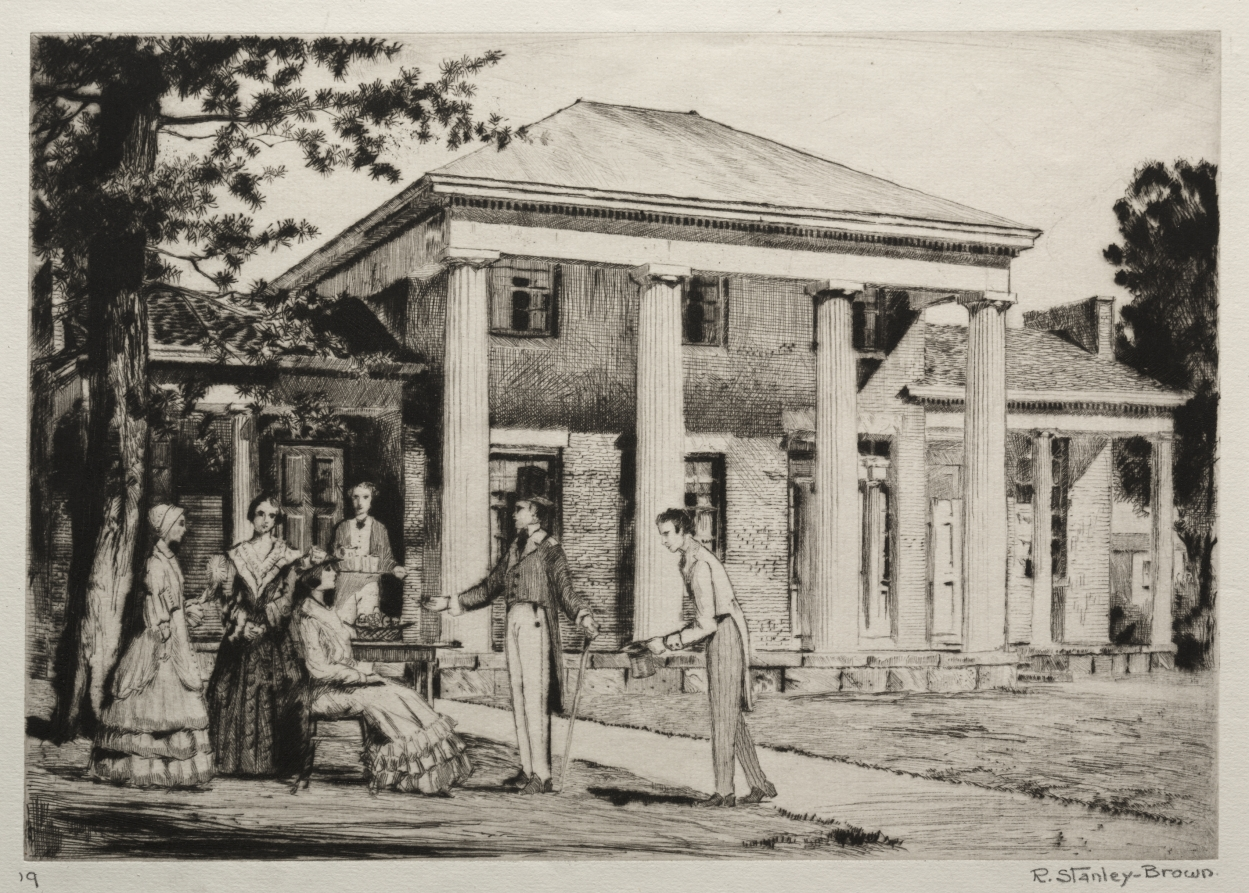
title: The Fifties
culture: America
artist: Rudolph Stanley-Brown (American, 1889–1944)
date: c. 1909–26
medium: drypoint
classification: Print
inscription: Penciled on lower-right corner: "R. Stanley-Brown (signed)"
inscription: Penciled on lower-left corner: "19"